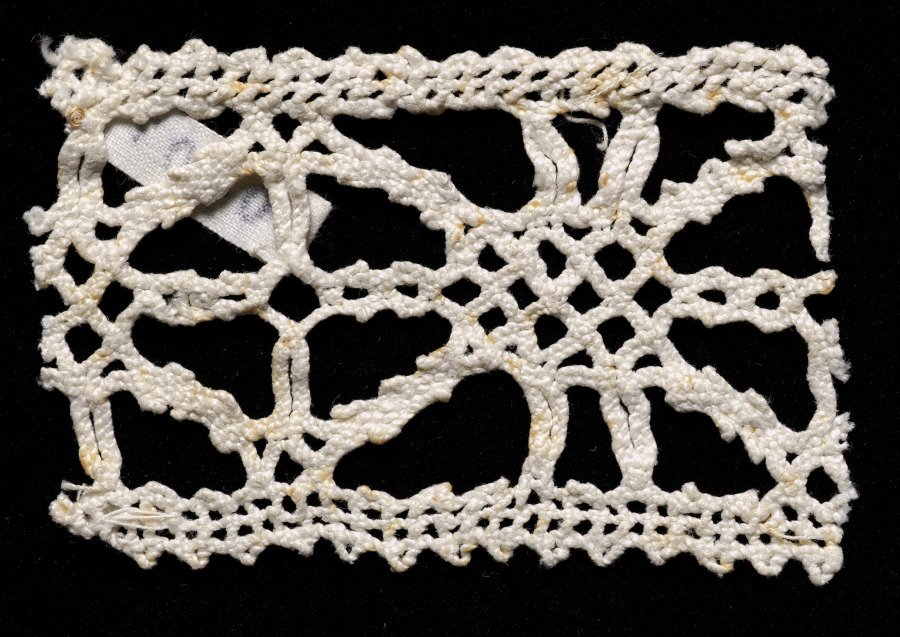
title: Lace Insertion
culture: Italy, Venice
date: 1540–60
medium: Bobbin lace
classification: Lace